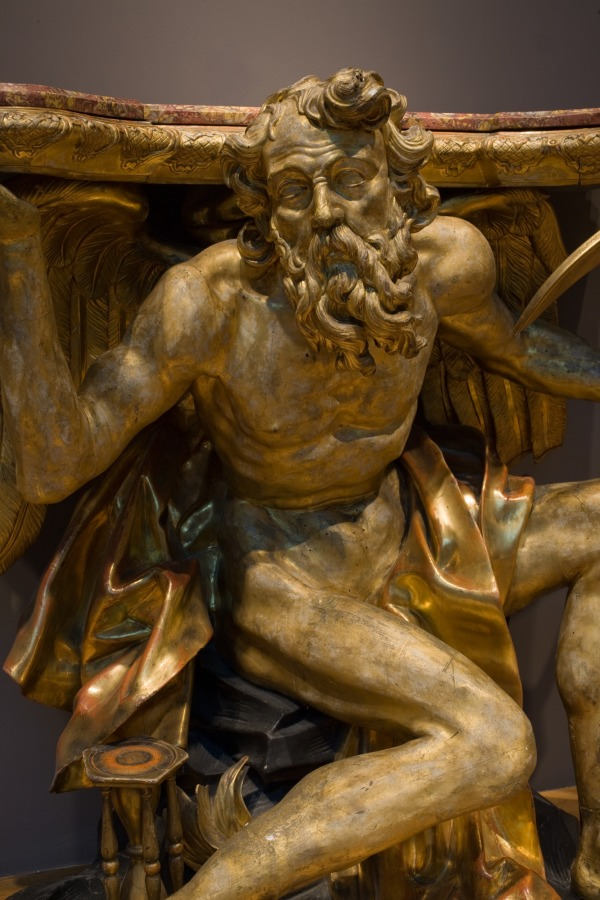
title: Console Table Depicting Chronos, or Father Time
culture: Italy, probably Rome, late 17th-early 18th Century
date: c. 1700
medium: painted and gilded wood, marble top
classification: Furniture and woodwork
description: The marble tabletop is supported by a gilded wooden figure of Father Time (or “Chronos”) adorned with his typical attributes of wings, a scythe, and an hourglass. The metaphorical weight of his eternal role is emphasized as he bears the heavy stone slab on his shoulders while reaching up to ensure its balance.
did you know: Father Time’s scythe symbolizes natural cycles, like the harvest, and time's unstoppable flow that cuts down all living things.